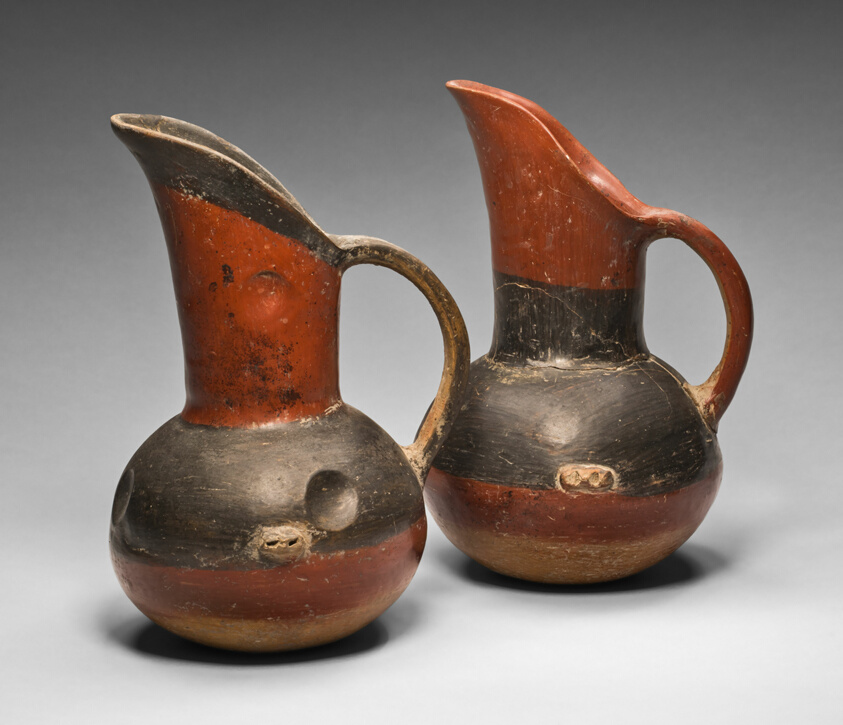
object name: Vessel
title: Polychrome Pitcher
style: cholula, mesoamerican, americas, Arts of the Americas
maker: Cholula (Cholula, Mexico)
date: 1400–1520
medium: Earthenware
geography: Cholula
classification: pitcher (vessel); earthenware; art of the americas; vessel; ceramics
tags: servingware